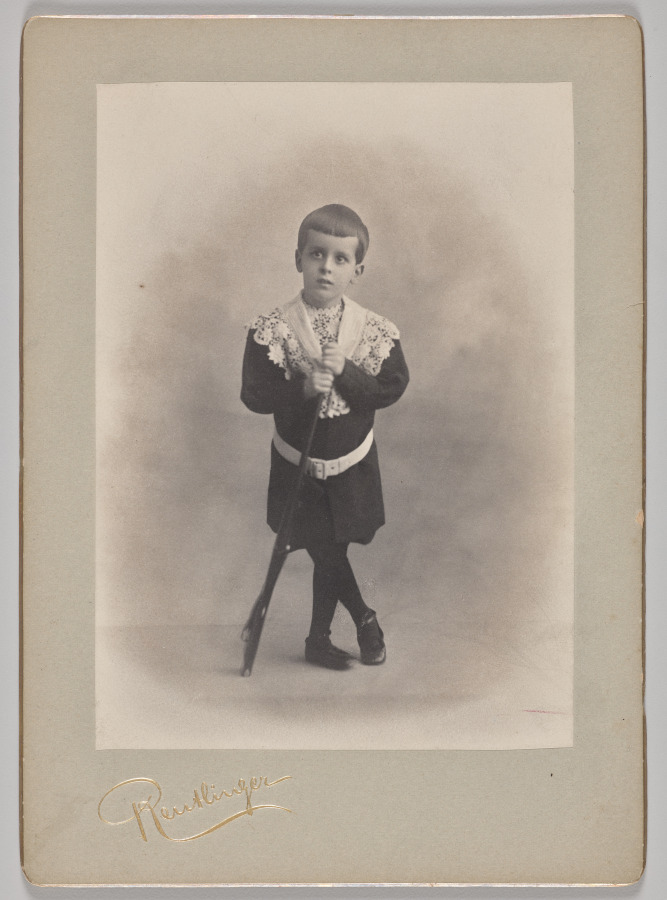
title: Untitled (young boy with lace collar and toy rifle)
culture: France, 19th century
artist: Reutlinger Studios (French, active 1850s-1937)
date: 1880–99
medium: gelatin silver print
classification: Photograph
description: This portrait of a boy holding a rifle suggests an association of masculinity with militarism in that era. Militaristic attitudes had a strong hold in France following the country’s defeat in the 1870–71 Franco-Prussian War. Many French people wanted revenge for Prussia’s annexation of Alsace-Lorraine, territories that did not return to French control at the end of World War I in1919. Looking at this portrait in hindsight, one might wonder if this boy served in the military or was a casualty during that war.